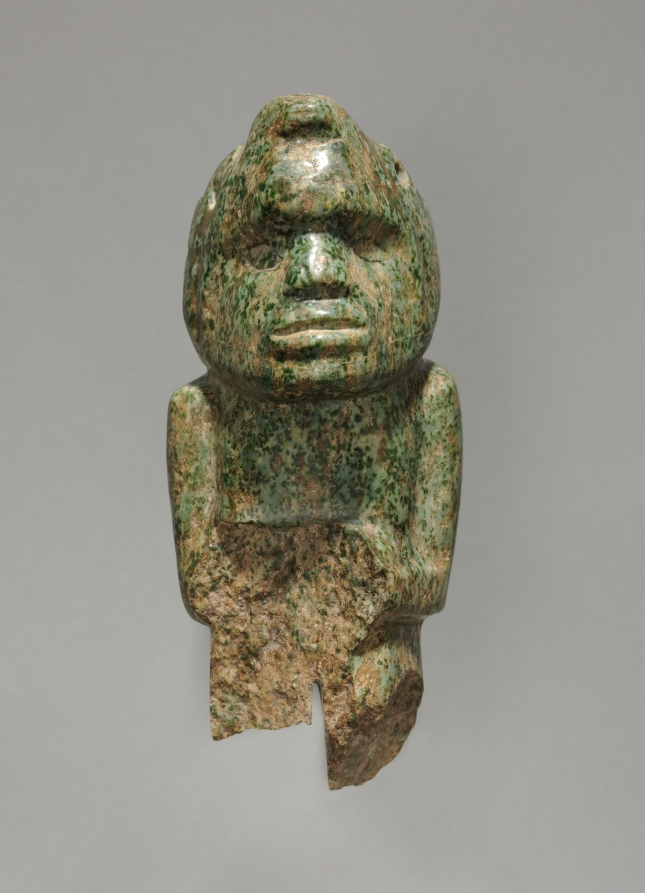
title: Axe-Shaped Figure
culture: Mexico, Oaxaca, Mixteca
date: after 900(?)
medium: Metadiorite (?)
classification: Sculpture